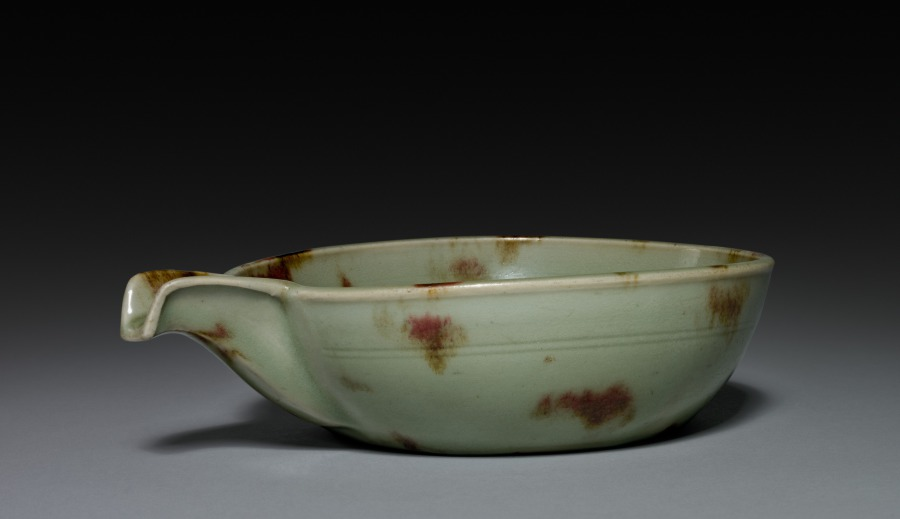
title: Spouted Bowl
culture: China, Zhejiang province, Longquan region, Yuan dynasty (1271-1368)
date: 1300s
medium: Celadon-glazed stoneware spotted with copper red, Longquan ware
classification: Ceramic